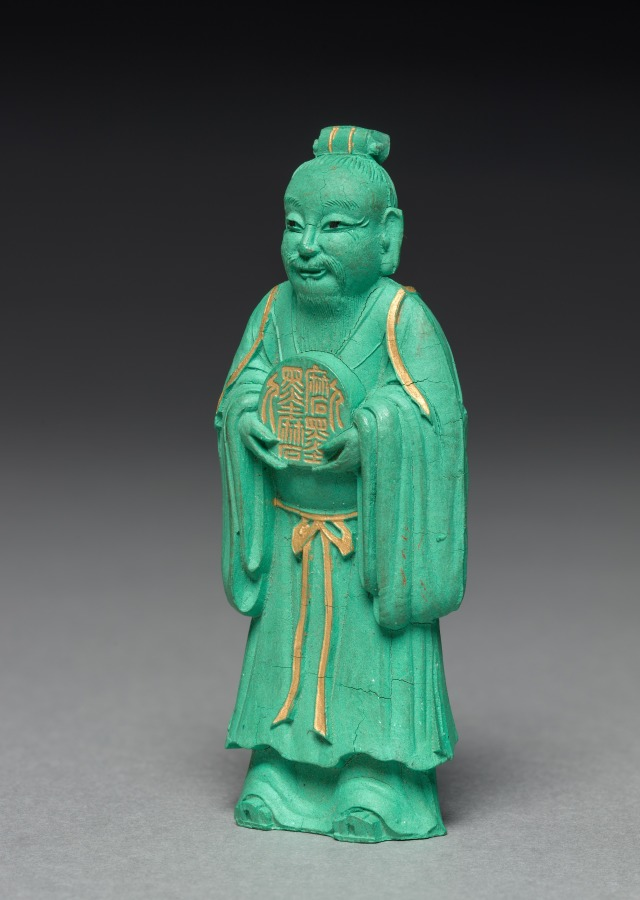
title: Ink Cake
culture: China, Qing dynasty (1644-1911)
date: late 19th Century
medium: ink cake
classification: Miscellaneous